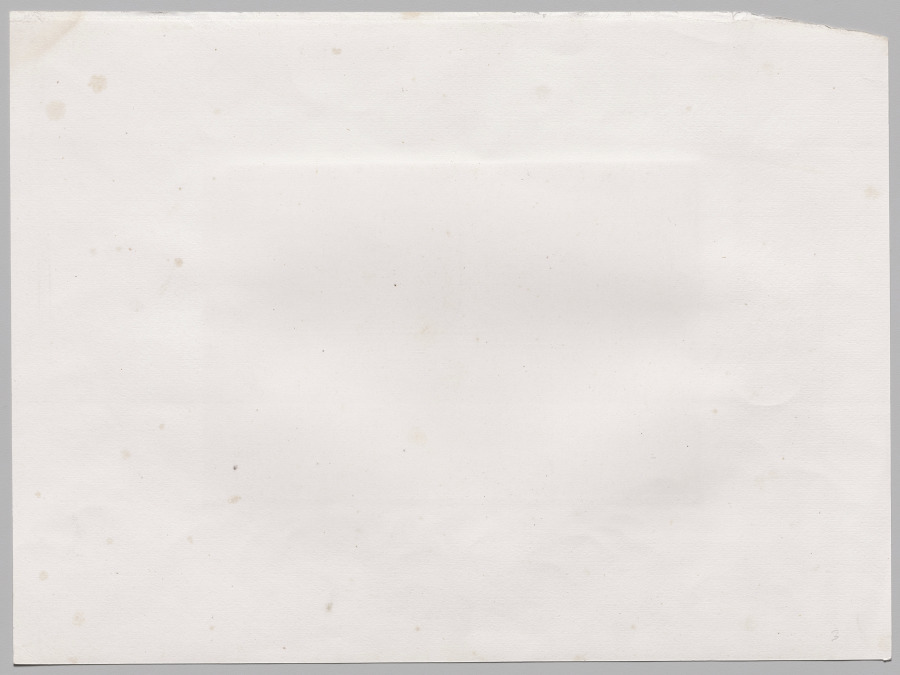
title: Grand Temple D’Isis, à Philoe (vue générale prise du nord), Nubie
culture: France, 19th century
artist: Maxime Du Camp (French, 1822–1894)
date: 1850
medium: Salted paper print, Blanquart-Évrard process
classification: Photograph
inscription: Imprinted in black on recto of mount: “NUBIE”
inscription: Imprinted in black on recto of mount: “Maxime Du Camp Gide et Baudry, Editeurs.”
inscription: Imprinted in black on recto of mount: “GRAND TEMPLE D’ISIS, A PHILOE/VUE GÉNÉRALE.”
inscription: Imprinted in black on recto of mount: “Imprimerie Photographique de Blaquard-Evard, a Lille.”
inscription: Imprinted in black on recto of mount: “Pl. 80”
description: The Temple of Isis at Philae (spelled Philoe by Du Camp) was built on an island 380–362 BC in the Nile. Following construction of the Lower Aswan Dam in 1902, it was reconstructed on a nearby island. This photograph by Du Camp is not only a picturesque image of historically significant ruins but also shows the temple as it looked when still in its original site.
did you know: Maxime Du Camp was the first photographer to depict the marvels of ancient Egypt.